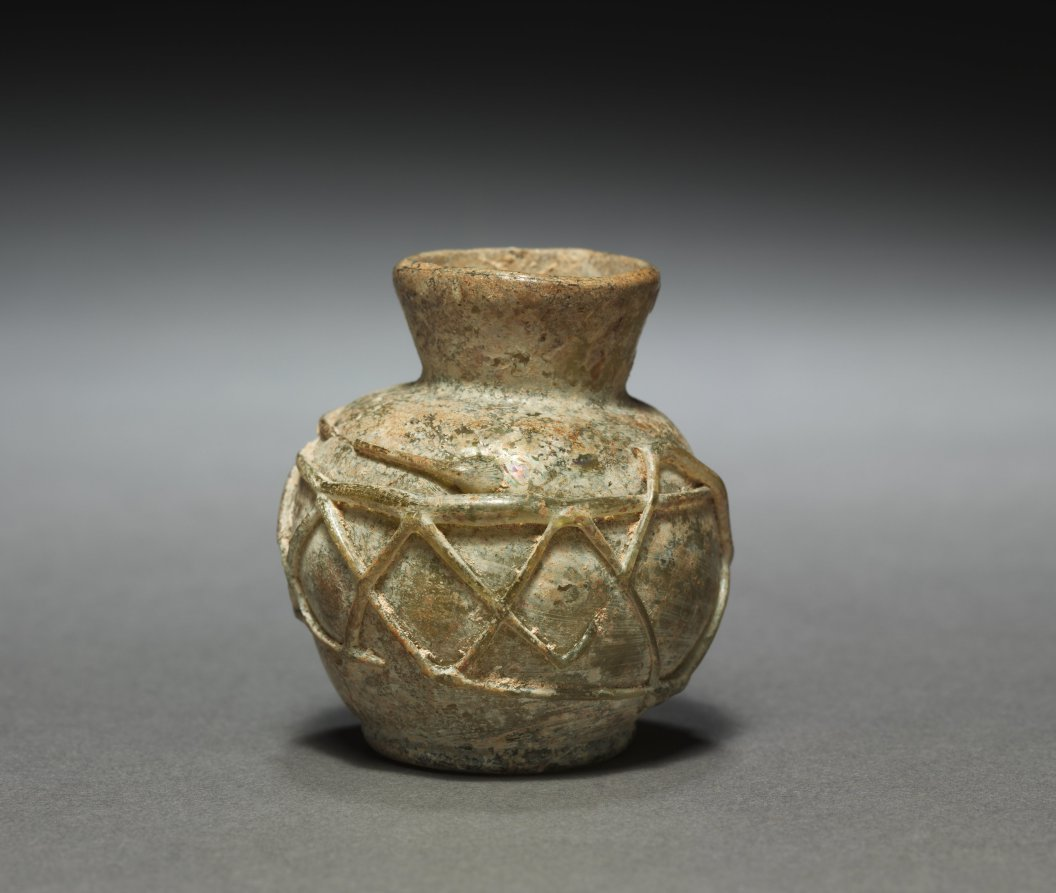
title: Vase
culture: Iran, Sasanian Empire (224–651 CE)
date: c. 224–650 CE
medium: glass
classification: Glass